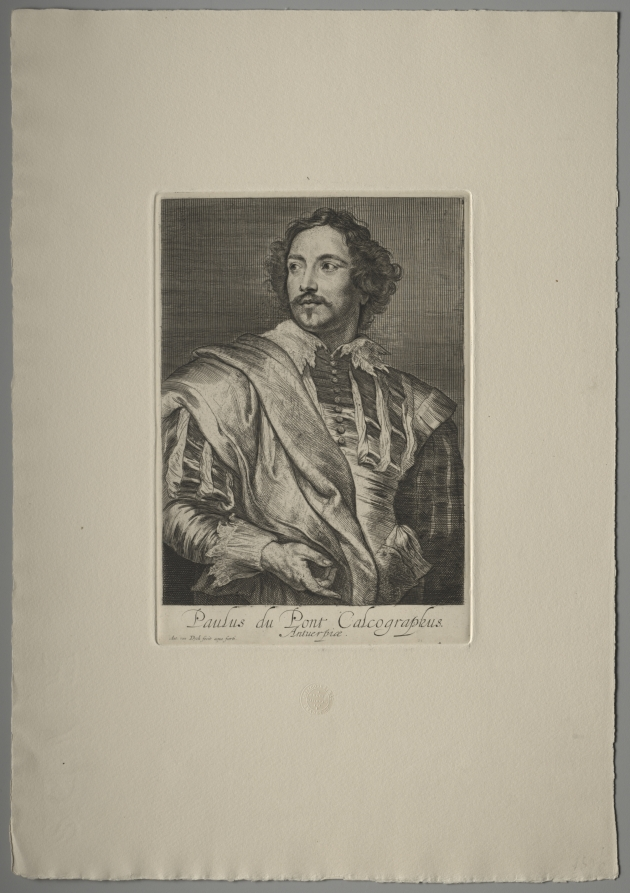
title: Paulus Pontius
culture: Flanders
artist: Anthony van Dyck (Flemish, 1599–1641)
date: 1630–33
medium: etching and engraving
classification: Print